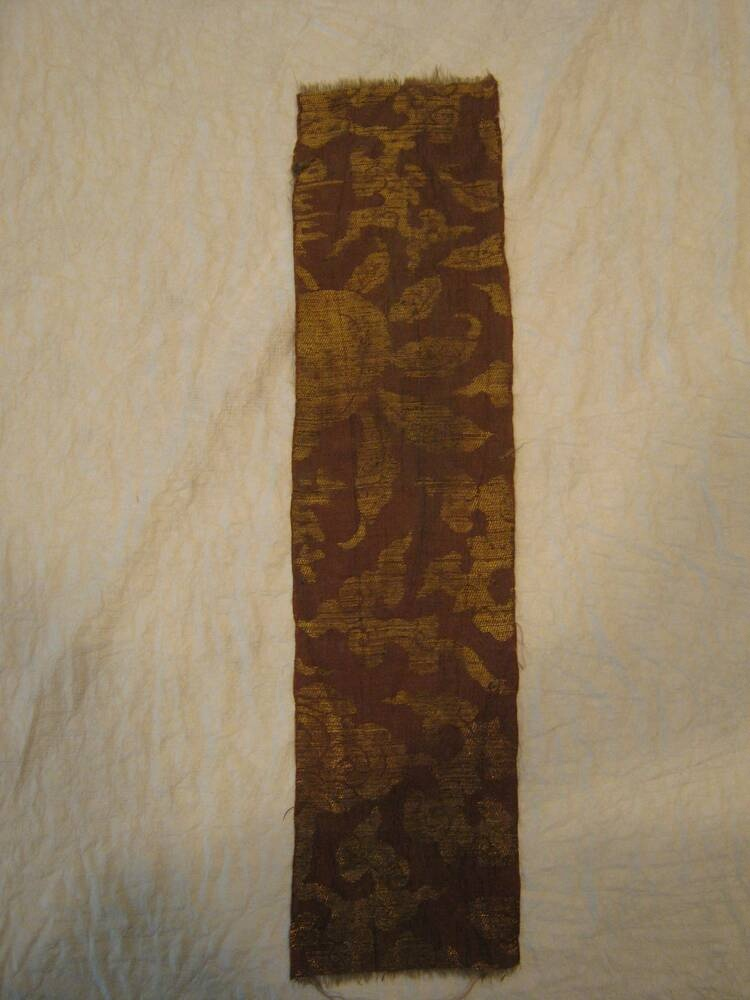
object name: Textile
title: Fragment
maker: China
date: Edo period (1615–1868), 1725/75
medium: silk, plain weave with gilt-metal-strip supplementary brocading wefts held in twill interlacings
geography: Japan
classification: textile; weaving